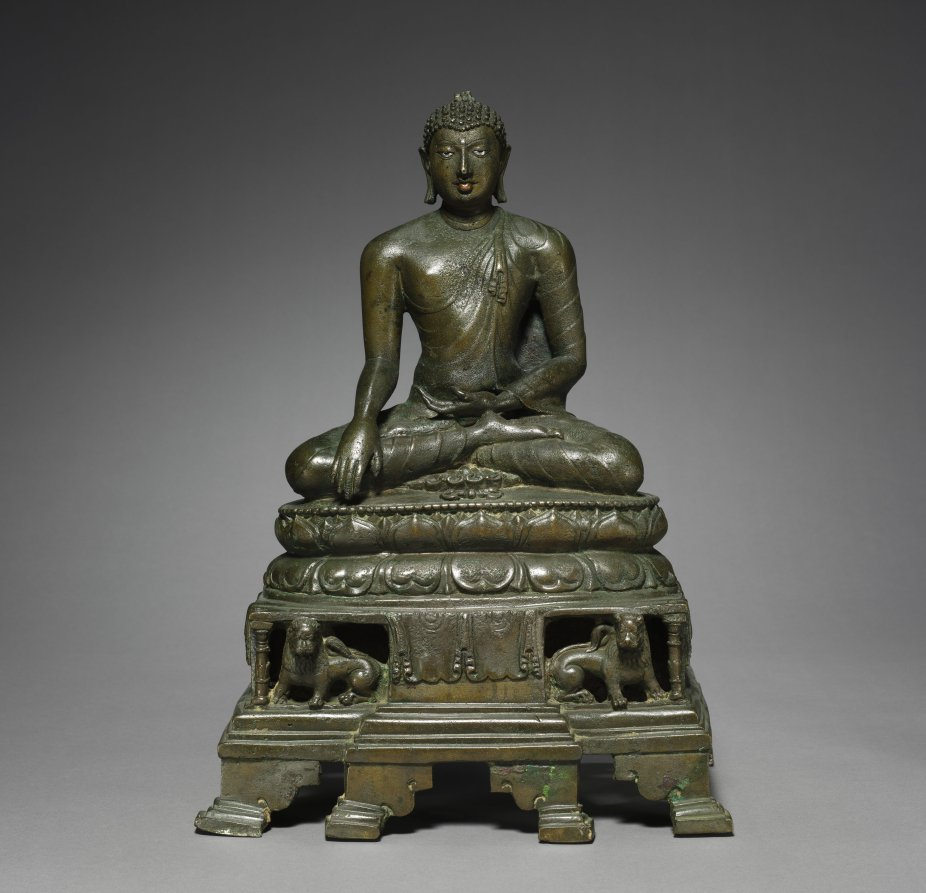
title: Akshobhya: the Buddha of the East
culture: Northeast India, Bihar, Kurkihar, Pala period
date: late 800s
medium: bronze with silver and copper inlay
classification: Sculpture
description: Made during the Pala period (750-1134) when tantric imagery was first emerging in northeastern India, this sculpture is from a cache that yielded some of the most masterful works of the north Indian bronze tradition. From this region, Tantra spread to Southeast Asia. The double-headed thunderbolt, or vajra, placed on top of the pedestal in front of the figure indicates that this is a tantric image. His hand gestures identify him as one of the Five Cosmic Buddhas, each of whom is associated with a cardinal direction of space: north, south, east, west, and center. The Buddha Akshobhya is especially invoked to eradicate the harmful emotion of anger.